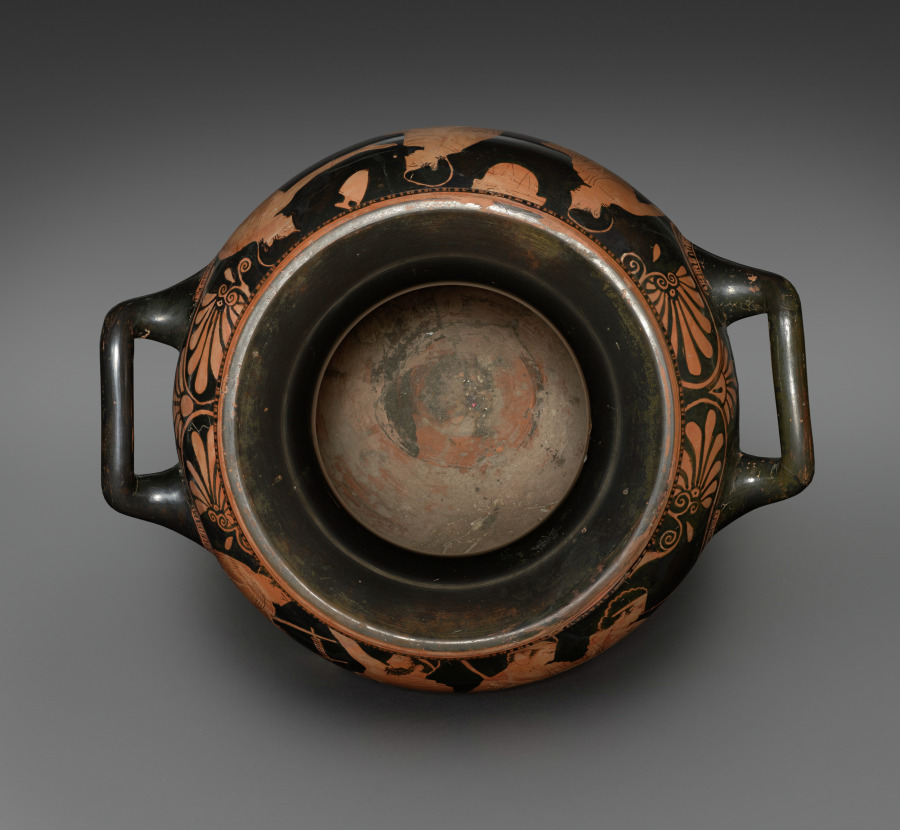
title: Red-Figure Stamnos (Mixing/Storage Vessel): Komos (Musicians and Revelers)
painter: attributed to Kleophon Painter (Greek, Attic, active c. 440–410 BCE)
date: c. 435–425 BCE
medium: Ceramic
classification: Ceramic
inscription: Κ Α Λ Ο Σ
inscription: Κ Α Λ Ο [Σ]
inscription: black '080'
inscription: black 'WF2'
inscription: black '0.19'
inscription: red '09.6'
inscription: partially removed red and white sticker, with number blacked out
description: Four lively figures move to the right across the front side of this stamnos, a vase used for storing and mixing wine. First comes a finely dressed woman playing the pipes, followed by three male figures, all nearly nude. The bearded one holds a drinking cup and reaches back, perhaps dancing, while the last in line concentrates on the music of his lyre.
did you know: The Athenian stamnos, a shape favored by the Etruscans, was made primarily for export.